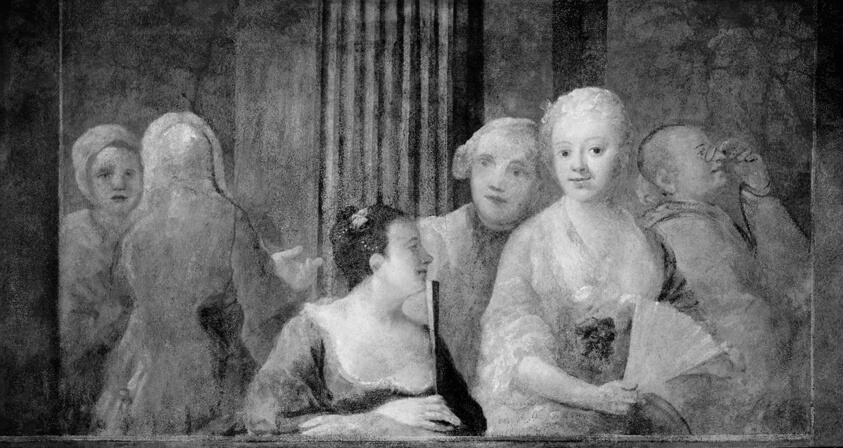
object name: Painting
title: Fashionable Figures, with Two Women Holding Fans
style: 18th Century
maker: Artist unknown (British, active 18th century)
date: 1733/35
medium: Oil on plaster, mounted on aluminum honeycomb panel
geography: England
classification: oil on plaster; metal; oil paintings (visual works); british; paint; painting; european painting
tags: women, fans, fashion, figures, interior, man, men, social, woman